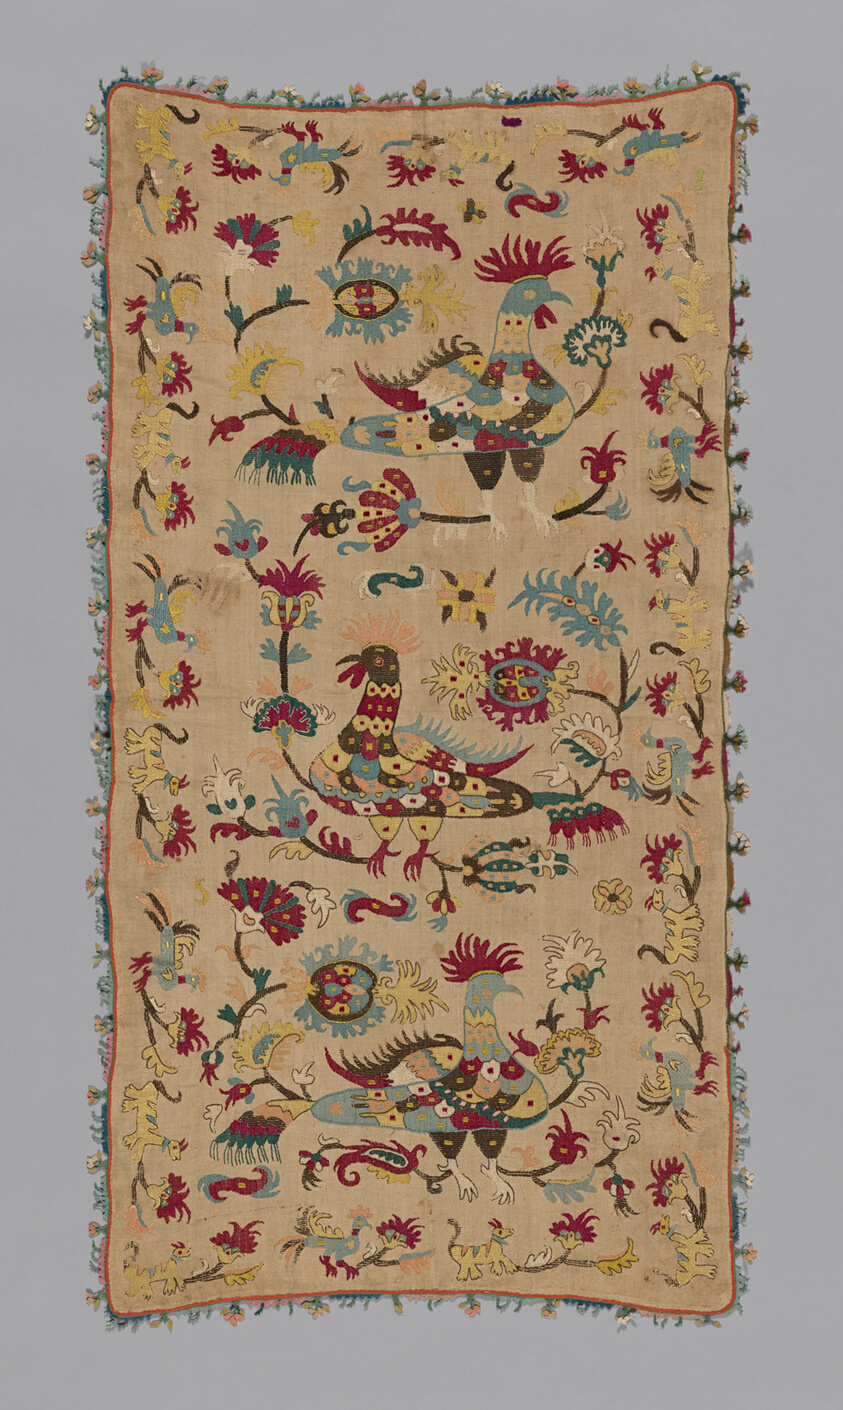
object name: Textile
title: Cushion Cover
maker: Greece, Northern Sporades Islands, Skíros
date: 17th century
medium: Linen, plain weave; embroidered with silk in running (pattern darning), satin, and stem stitches; edged with silk and horsehair, needle lace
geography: Skíros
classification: textile; needlework (visual works)